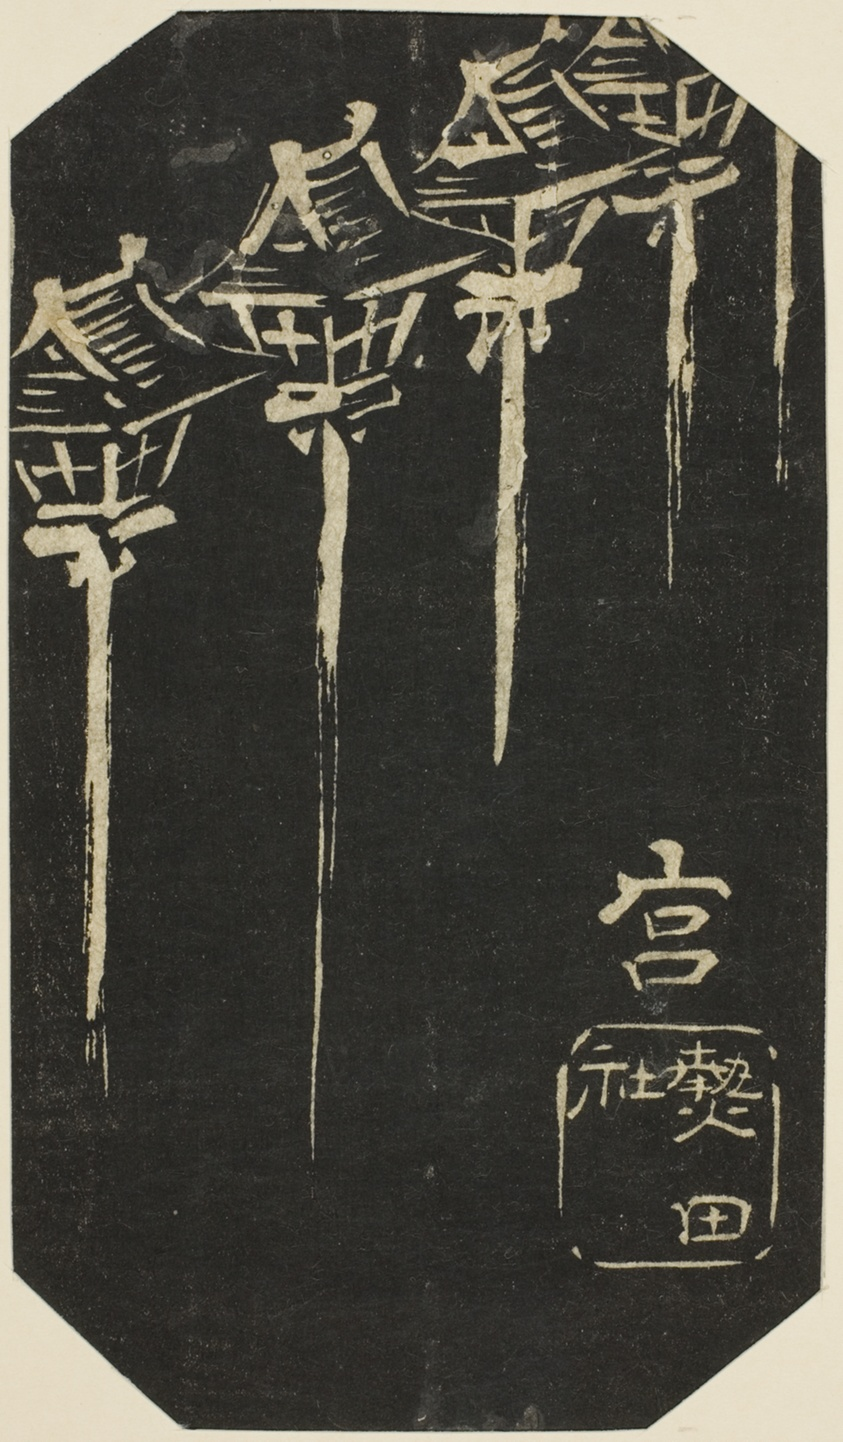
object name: Print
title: Miya, section of sheet no. 10 from the series "Cutout Pictures of the Tokaido (Tokaido harimaze zue)"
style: Japanese (culture or style)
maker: Utagawa Hiroshige 歌川 広重; Japanese, 1797-1858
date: c. 1848/52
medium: Color woodblock print; section of harimaze sheet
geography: Japan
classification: woodblock print; print; asian art